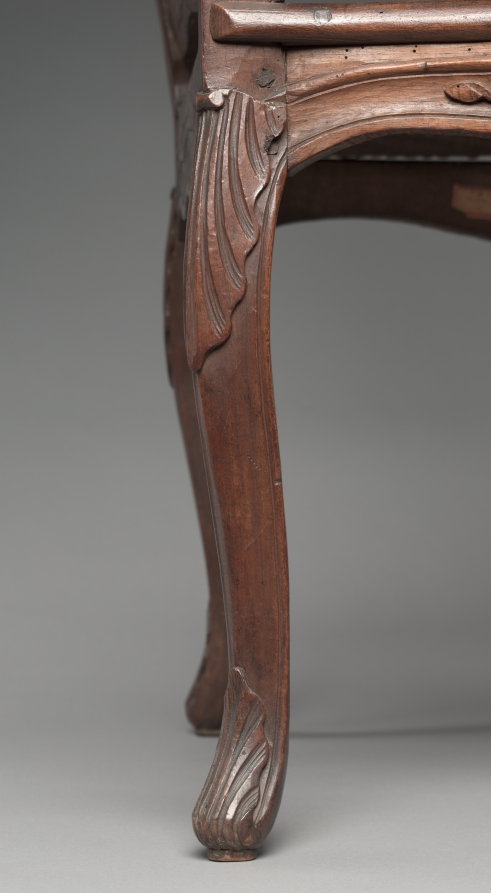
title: Armchair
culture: France, 18th century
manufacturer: René Cresson (French, c. 1705–c. 1749)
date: c.1740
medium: carved wood, cane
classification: Furniture and woodwork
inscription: signed underneath on strip across back: "CRESSON LAINE" (the trademark for René Cresson).